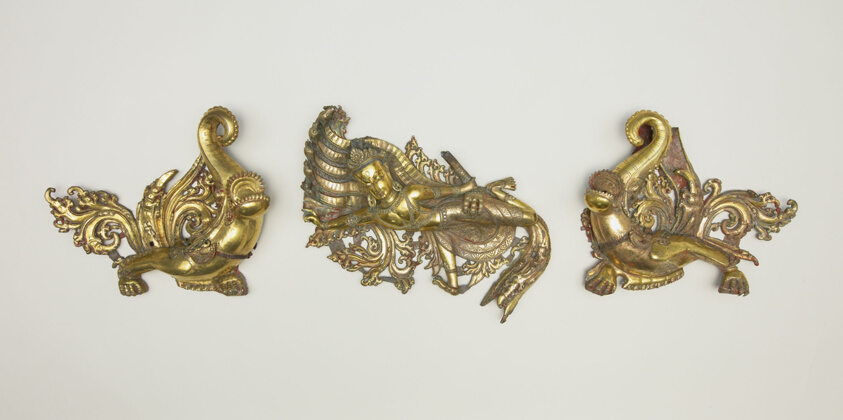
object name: Religious/Ritual Object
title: Set of Three Shrine Ornaments with Two Crocodiles (Makara) and a Serpent King (Nagaraja)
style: Himalayan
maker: Nepal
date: 16th/17th century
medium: Gilt copper worked in repoussé, with traces of red pigment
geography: Nepal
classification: metalwork; asian art; ritual objects